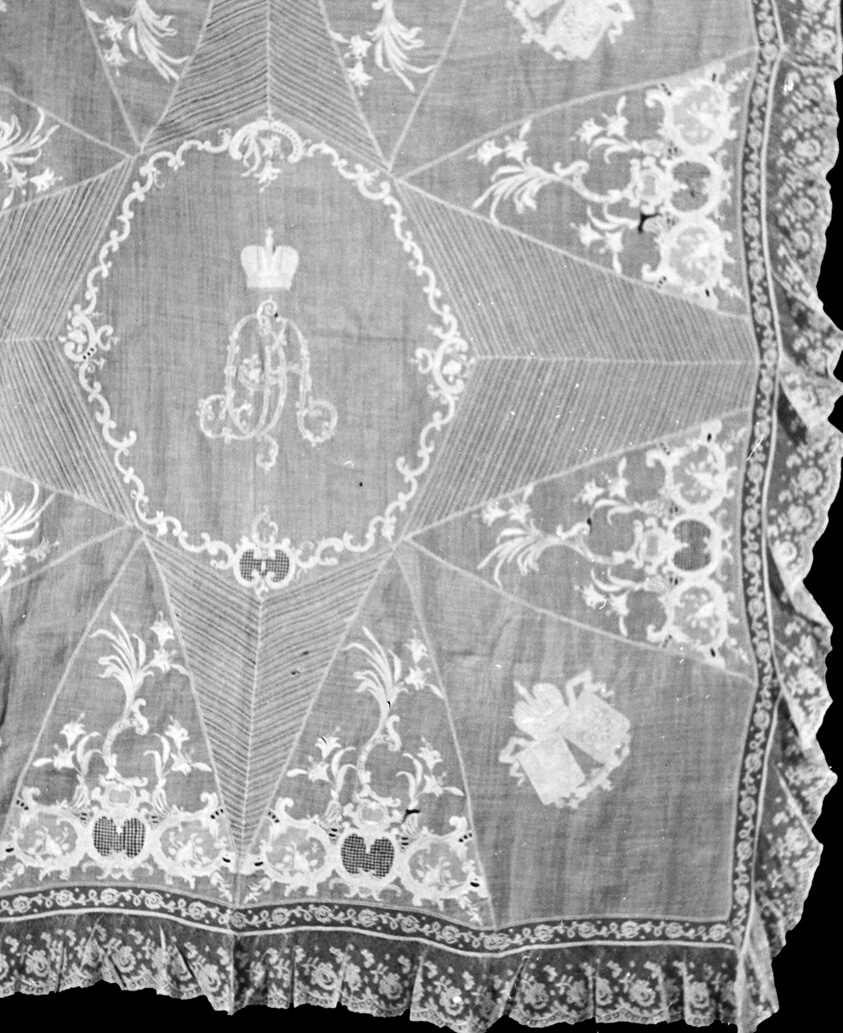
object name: Textile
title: Cover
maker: Russia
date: 18th century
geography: Russia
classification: textile; needlework (visual works)